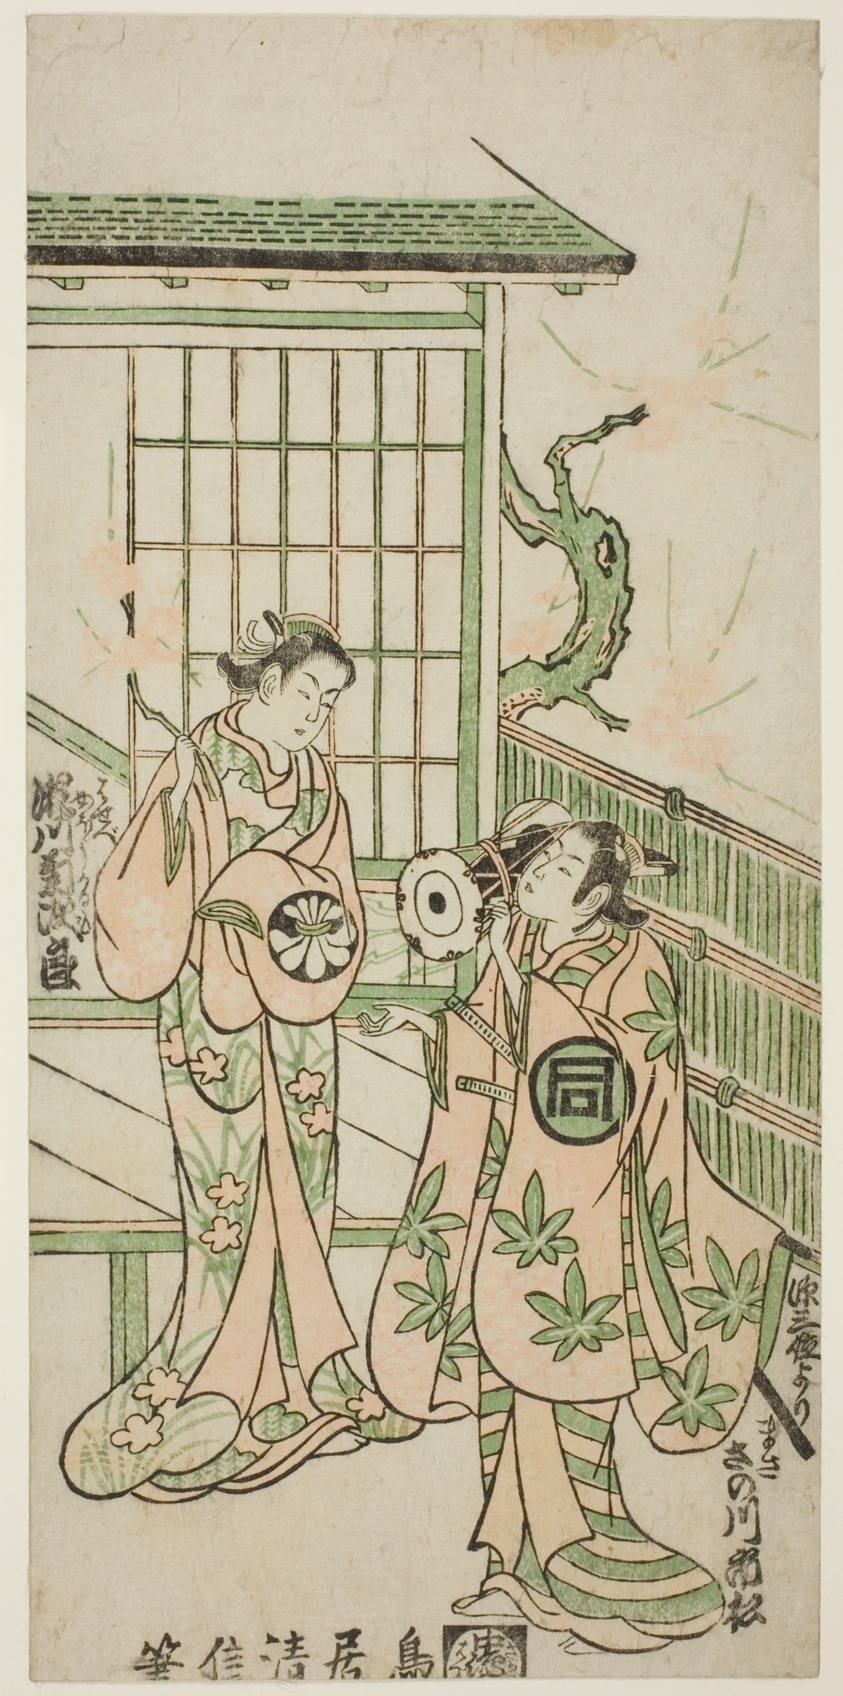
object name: Print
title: The Actors Sanogawa Ichimatsu I as Minamoto no Yorimasa and Segawa Kikujiro I as Nobutsura's wife Karumo in the play "Shusse Momijigari," performed at the Ichimura Theater in the eleventh month, 1747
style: Japanese (culture or style)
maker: Torii Kiyonobu II (Japanese, active c. 1725-61)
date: 1747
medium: Color woodblock print; hosoban, benizuri-e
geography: Japan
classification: woodblock print; print; asian art